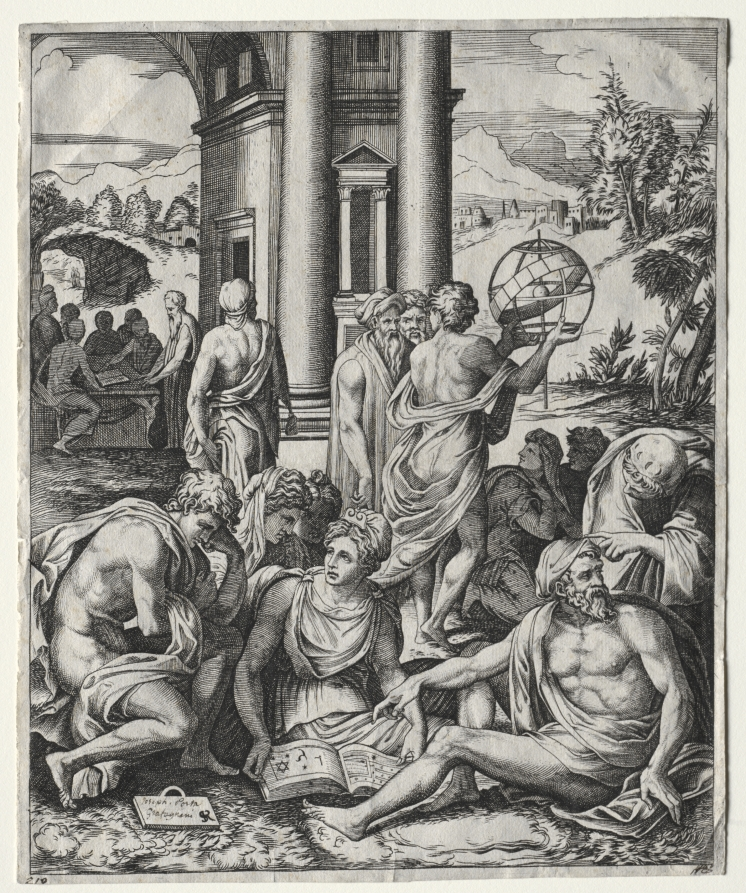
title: An Assembly of Scholars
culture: Italy, 16th century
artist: circle of Marco Dente (Italian, c. 1486–1527)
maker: after Giuseppe Porta (Italian, 1515–1580)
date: c. 1515/1527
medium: engraving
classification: Print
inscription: lower left, in plate: RS [in monogram] ; by William Esdaile?, lower left, in pen and brown ink: 210 ; by William Esdaile, lower right, in pen and brown ink: WE ; lower left, on tablet, in pen and brown ink: Joseph. Porta / Grafagnani ; VERSO, by William Esdaile, lower left, in pen and brown ink: 1833 WE 210 ; upper right, in graphite: c4/ ; center, in graphite: Marco di Ravenna / 1490-1542 / Collection Esdaille ; center, in graphite: [illegible]6 / R1818 ; lower right, in graphite: B. V. 14 P. 356 N° 479 ; lower left, in graphite: a69471/ix- ; lower left, in graphite: mx/ ; lower center, in graphite: 105 ; lower right, in graphite: B XIV 356 479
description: In this imaginary, idyllic realm, classical philosophers and scholars gather to teach and learn. The men and women in the foreground examine a book of astrological signs. Behind them, a second group studies an armillary sphere, a celestial globe invented in ancient times that became a symbol of knowledge during the Renaissance. A woodcut version of this scene appeared as an illustration in the fortunetelling book Garden of Thoughts, published in Venice in 1540. In that context, the group of three women in the foreground might be seen as the three fates, and the man with the globe as a personification of astrology.